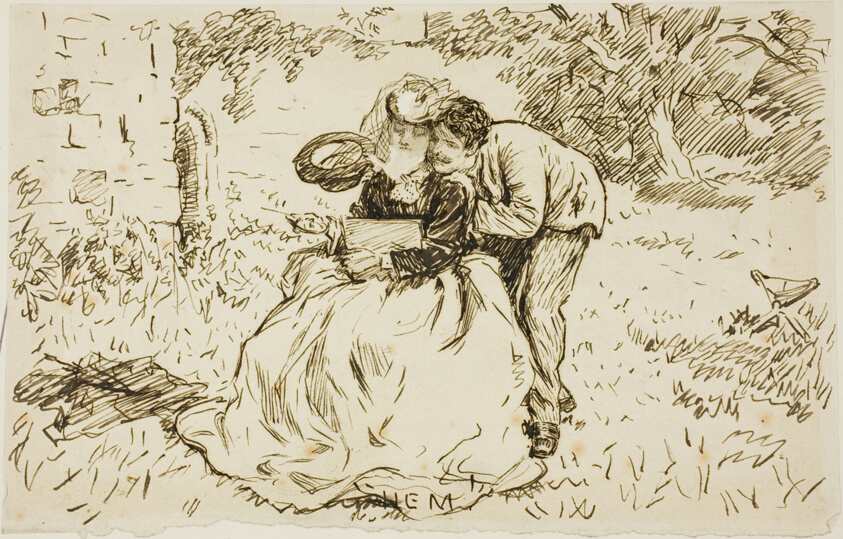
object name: Drawing and Watercolor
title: Perspective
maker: Attributed to Charles Samuel Keene; British, 1823-1891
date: 1870/91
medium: Pen and brown ink on buff wove paper, laid down on ivory wove card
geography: England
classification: pen and ink drawings; drawings (visual works); prints and drawing